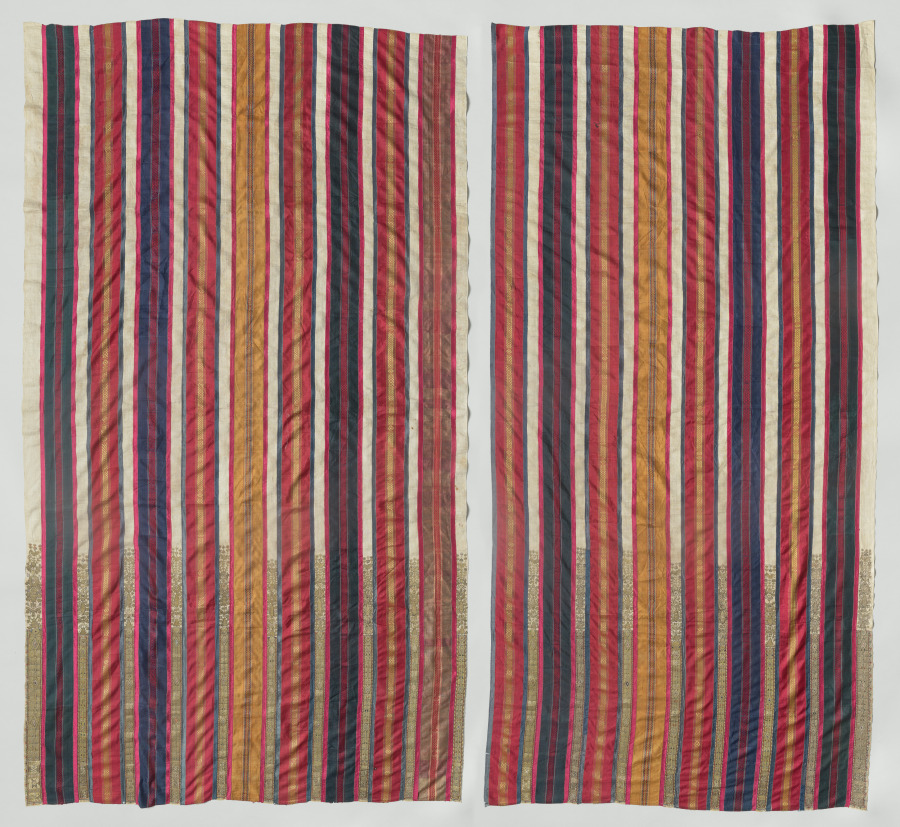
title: Curtain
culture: Africa, North Africa, Tunisia, Djerba, Tunisian weaver(s) and embroiderer(s)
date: 1600s–1700s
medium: Silk, linen, metal, and dye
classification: Embroidery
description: This pair of curtains displays colorful silk bands with woven geometric motifs, and cream bands with gold-embroidered plants, birds, six-pointed stars, and the khamsah (خمسة), an open five-fingered hand. Birds and the tree of life were popular good luck or fertility symbols linked to marriage. The cosmopolitan motifs would have resonated with Jews, Muslims, and Christians alike, reflecting its creation on multiethnic and multireligious Djerba, an island off the Tunisian coast. There, both goldsmithing and gold thread embroidery were done by Jewish artisans (male and female, respectively). The fine materials suggest they once hung in a wealthy home or for special occasions; interior wall hangings were typically made from rough wool.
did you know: When first acquired over a century ago, these curtains had fringe at their lower ends.